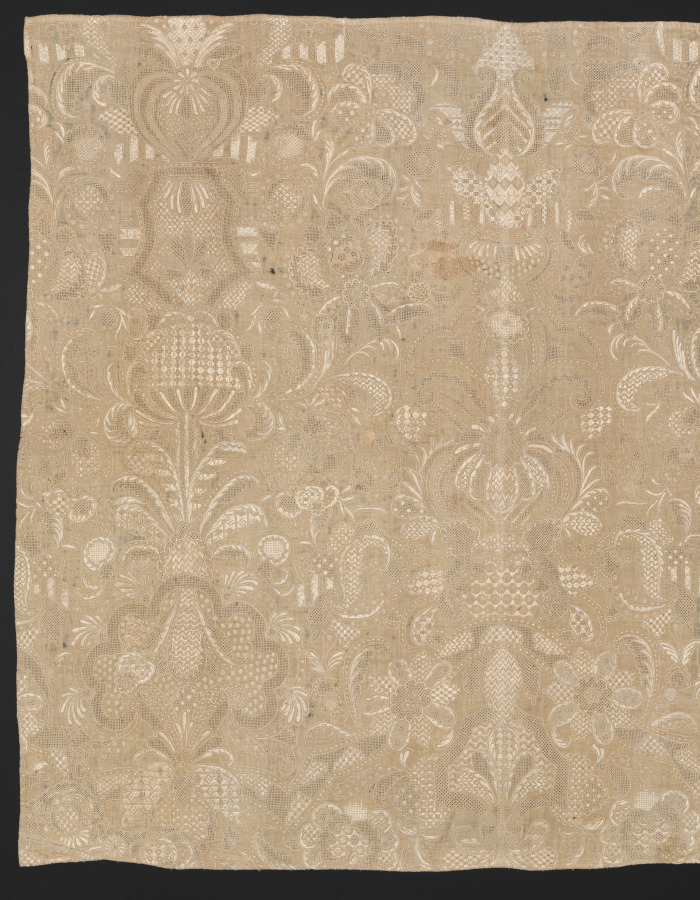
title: Fragment of Embroidered Cloth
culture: England or Ireland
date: 1700s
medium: Twill weave cotton: embroidered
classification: Embroidery